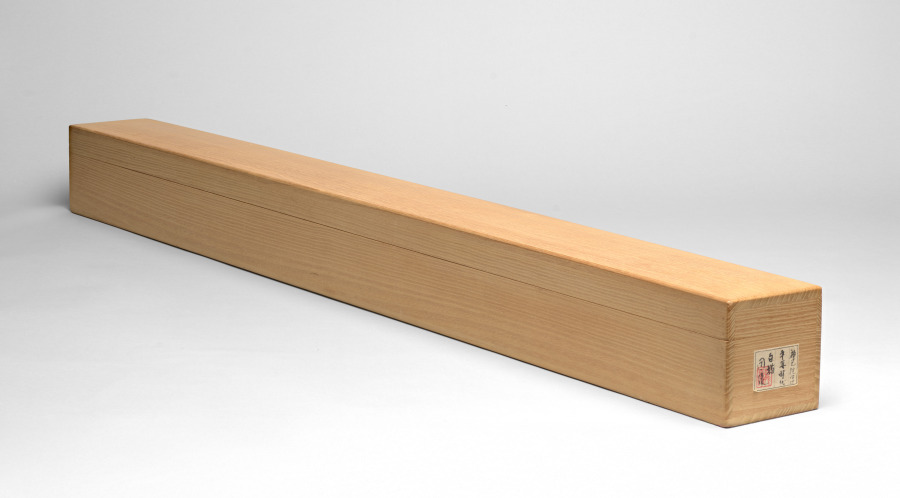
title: Iconographical Sketch (Zuzō) for the "Benevolent Kings Sutra Mandala"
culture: Japan, Heian period (794–1185)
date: 1100s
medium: Hanging scroll; ink on paper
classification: Painting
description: The Benevolent Kings Sutra has been a highly valued Buddhist scripture in Japan since the Nara period (710–794), when it started to be recited in a ceremony to pray for the peace and protection of the country. In the 800s, the monk Kūkai brought back from China a new translation of the text as well as Buddhist iconographic sketches to perform the rituals based on the sutra. Five scroll sets of copies of the original sketches brought by Kūkai are preserved in Daigoji and Tōji temples in Kyoto. This sketch, which has figural depictions of deities on the front and deities symbolized by objects on the back, differs in some ways from each of those sets, and represents an alternate approach to creating a mandala based on the Benevolent Kings Sutra.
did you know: The deity at the center is Fudō Myōō, the Immovable One.